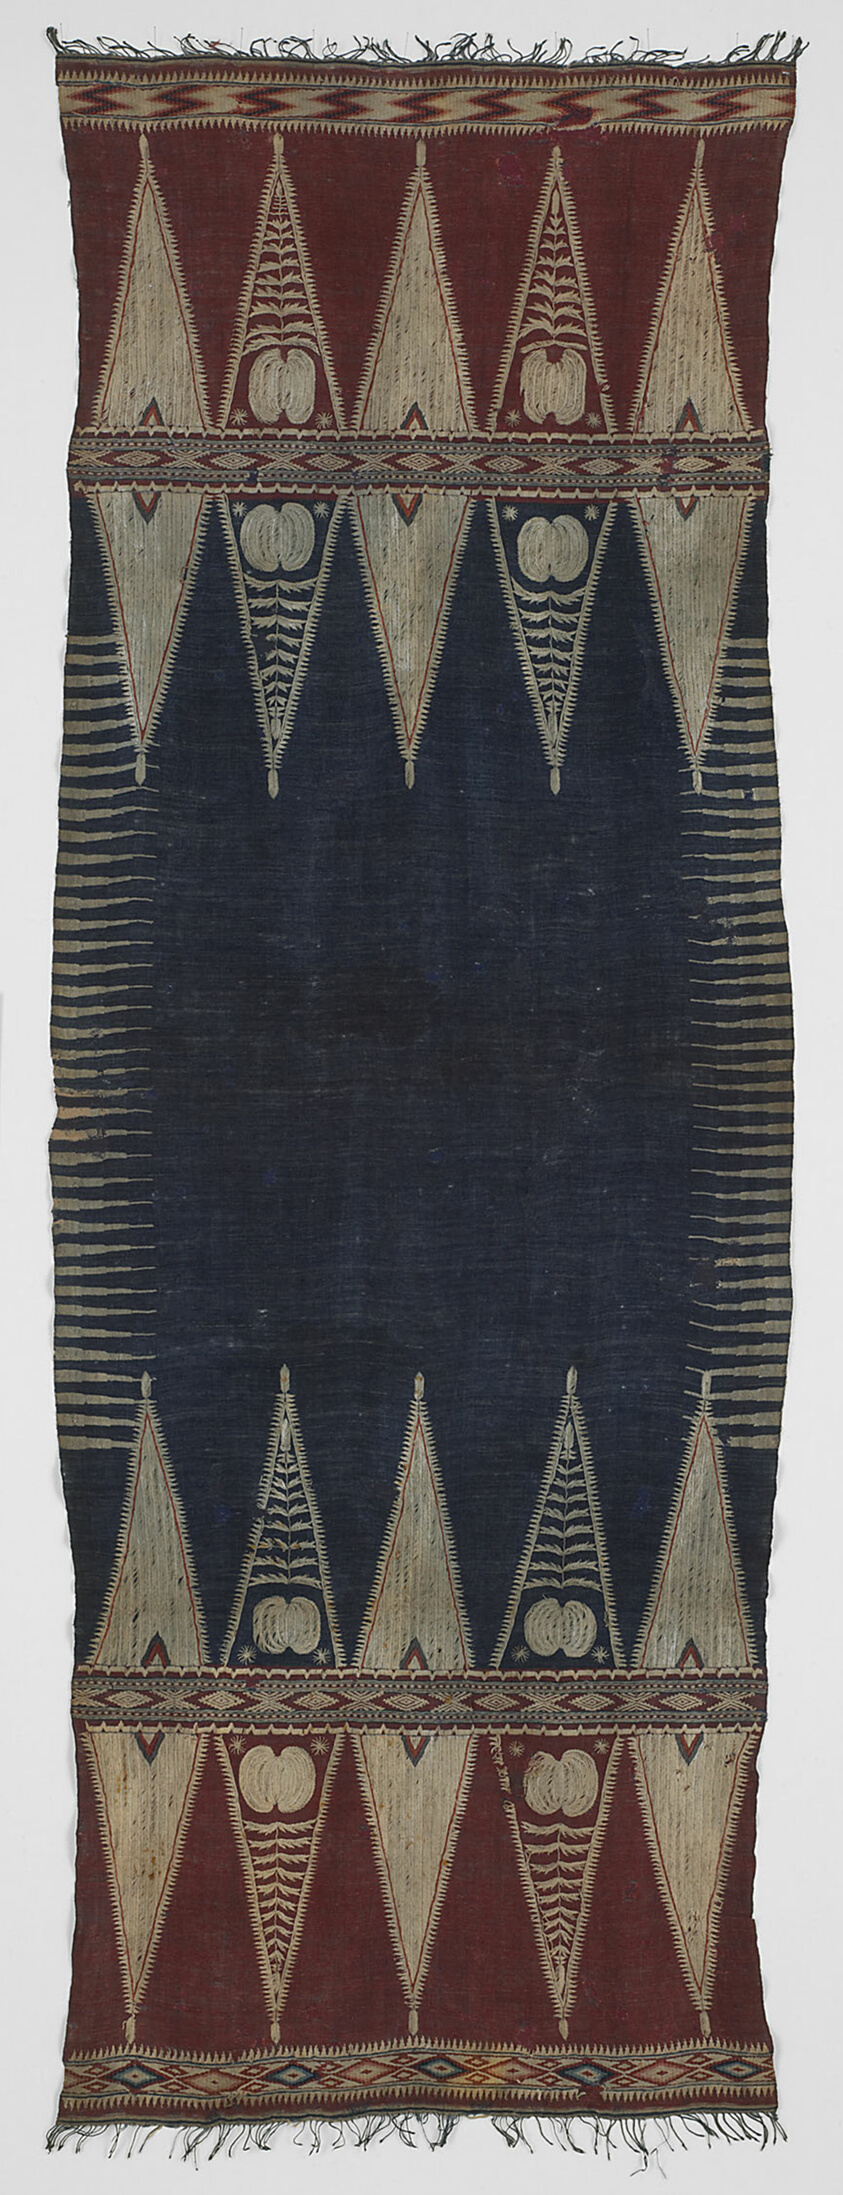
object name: Textile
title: Shoulder Cloth (?)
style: indonesian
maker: Komering (?); Indonesia, South Sumatra, Lampung area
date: End of the 19th century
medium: Cotton, bands of plain weave, of plain weave embroidered with cotton in chain, double running, eyelet hole and satin stitches; of plain weave with supplementary patterning and brocading wefts; of single interlocking tapestry weave; of weft twining; of weft resist dyed (weft ikat) plain weave; plied knotted warp fringe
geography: Indonesia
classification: textile; needlework (visual works)